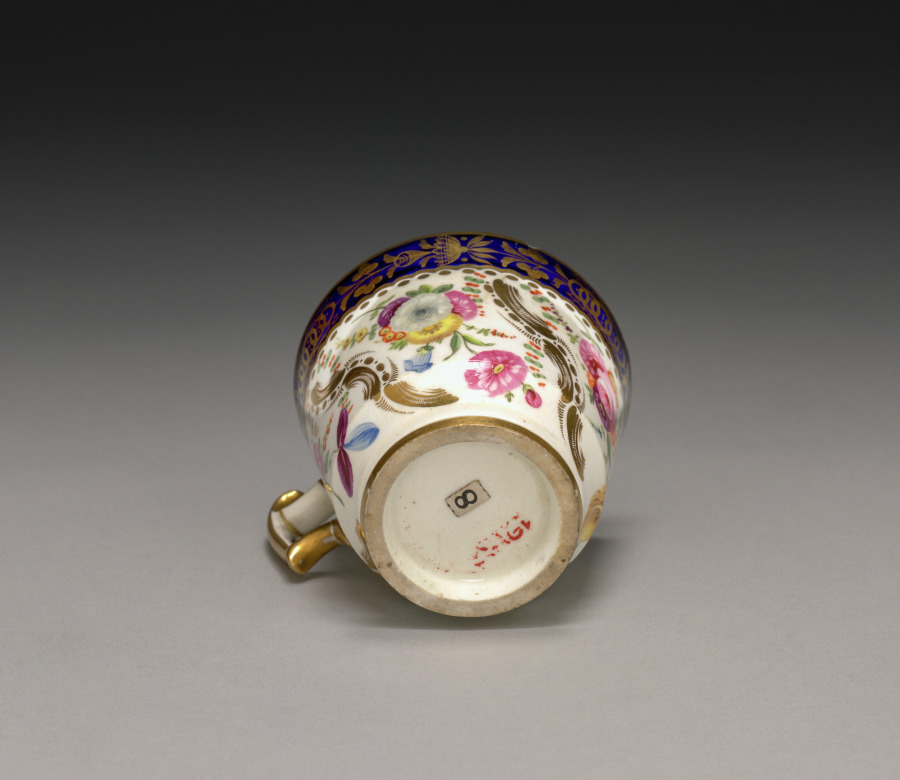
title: Cup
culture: England, Staffordshire, late 18th century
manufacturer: Spode Factory (British)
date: late 1700s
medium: porcelain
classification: Ceramic